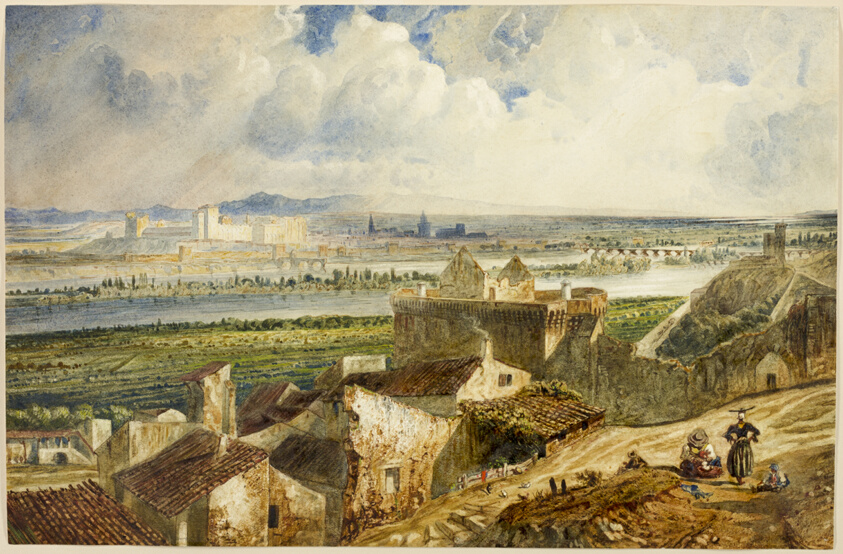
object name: Drawing and Watercolor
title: View of Avignon (from Villeneuve les Avignon)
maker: Paul Huet (French, 1803-1869)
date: 1823/69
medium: Watercolor, with touches of gouache and scraping, selectively varnished with gum arabic, over traces of graphite, on ivory wove paper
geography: France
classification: watercolor; drawings (visual works); prints and drawing